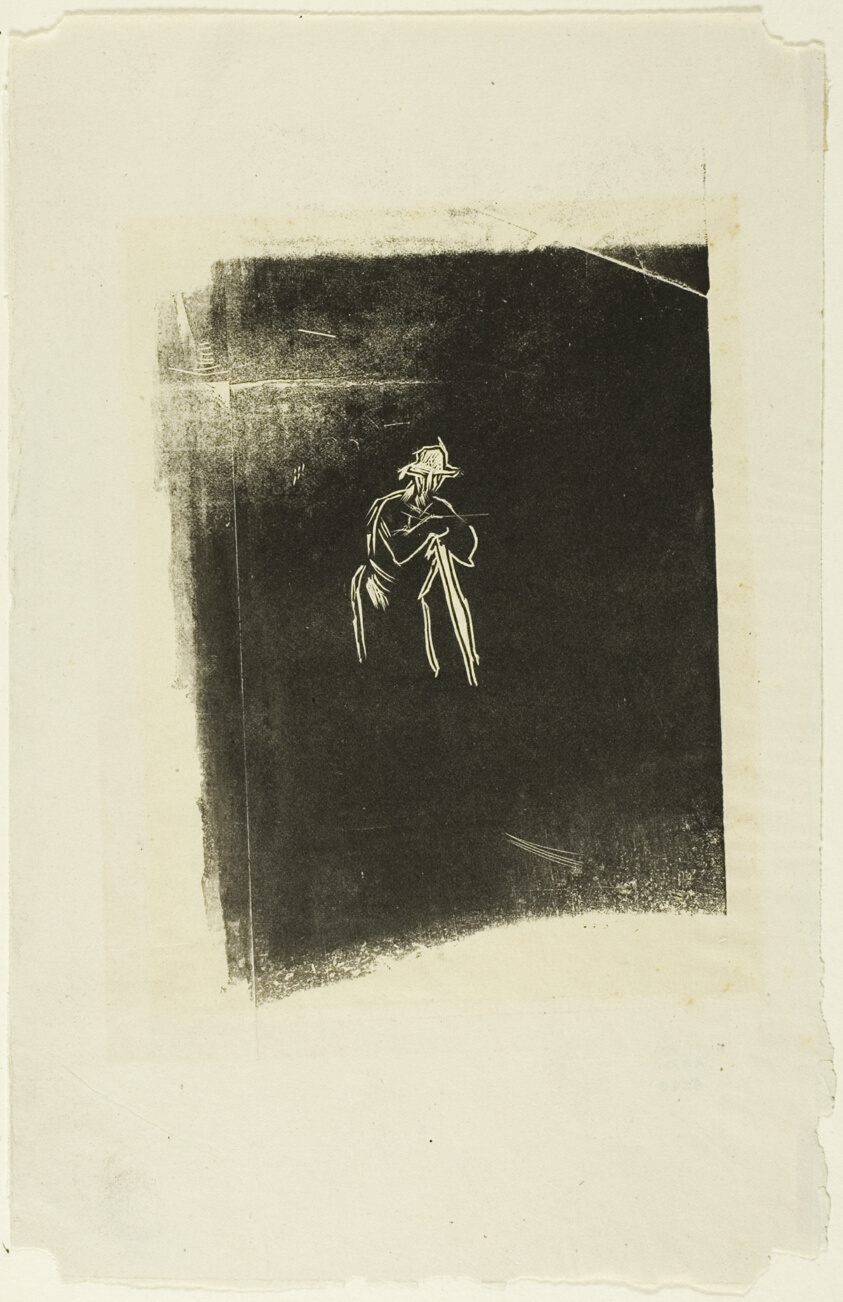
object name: Print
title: Man Resting On His Spade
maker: Jean François Millet (French, 1814-1875)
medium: Woodcut on ivory wove China paper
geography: France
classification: woodcut; print; prints and drawing